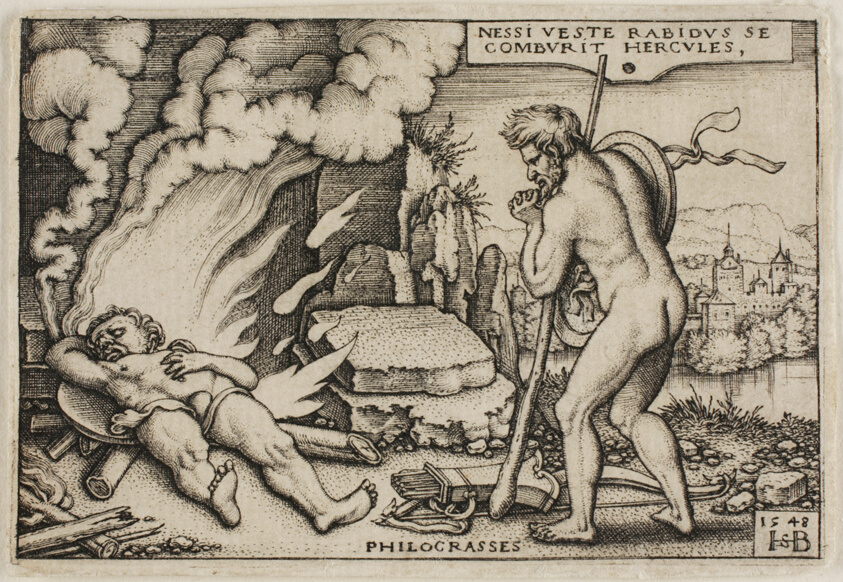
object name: Print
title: The Death of Hercules, from The Labors of Hercules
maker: Sebald Beham; German, 1500-1550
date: 1548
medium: Engraving in black on ivory laid paper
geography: Germany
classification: engraving; print; prints and drawing